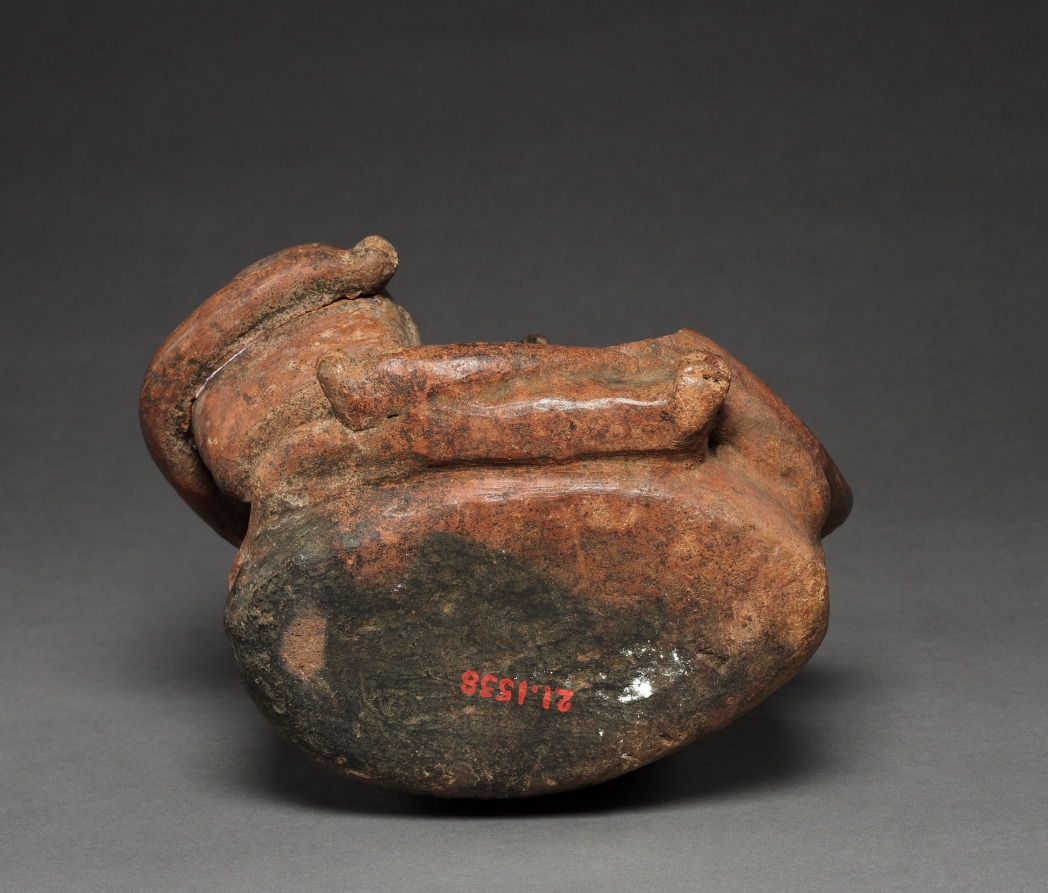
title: Figures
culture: Colombia, 18th-19th century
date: before 1921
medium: red ware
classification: Ceramic